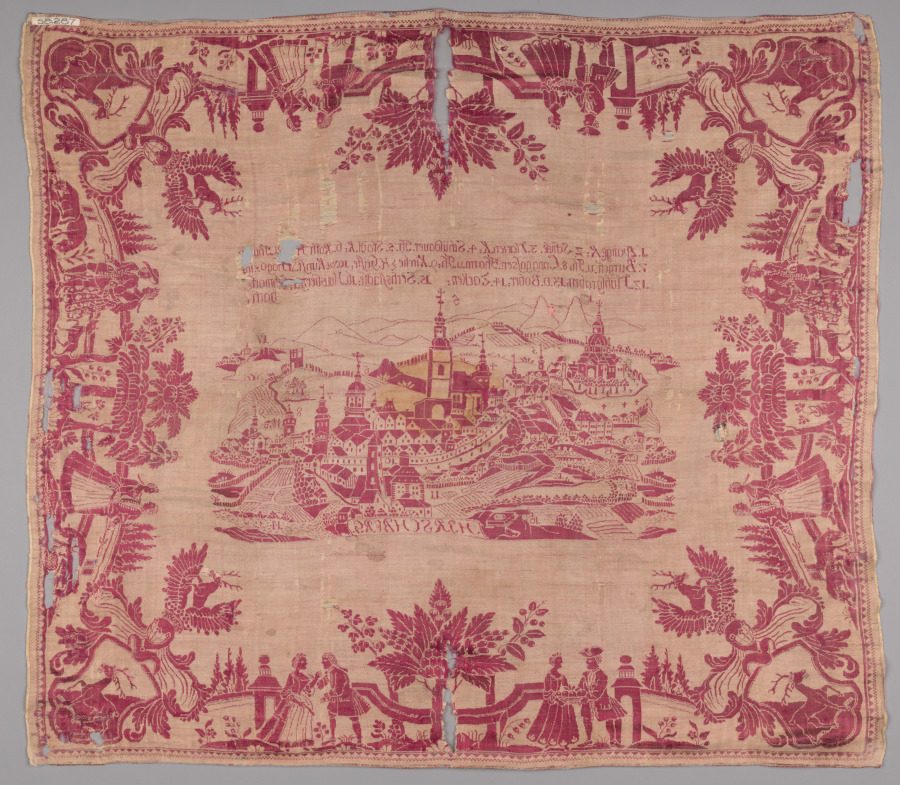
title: Square of Silk Damask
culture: Germany, Silesia ?, 18th century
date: 1700s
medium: satin weave; silk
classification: Textile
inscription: in the center, the principle buildings and landmarks of Hirschberg are numbered as follows and correspond to the list above: "1. Evange. K[irche]. 2. Schule. 3. Marienk[irche]. 4. Schüsdauer Th[urm]. 5. Stadt. K[irche]. 6. Rath Haus Thurm. 7. Burgch[anze] u[nd] Th[urm]. 8. Langgassen Thorm[auer] u[nd] Th[urm]. 9. Kirche z[um] H[eilige] Geiste. 10. W. Kunst. 11. Magazin. 12. Mühlgraben. 13. D. Bober. 14. Zachen. 15. Sechsstädte. 16. Hausberg. 17. Schwarzbach.